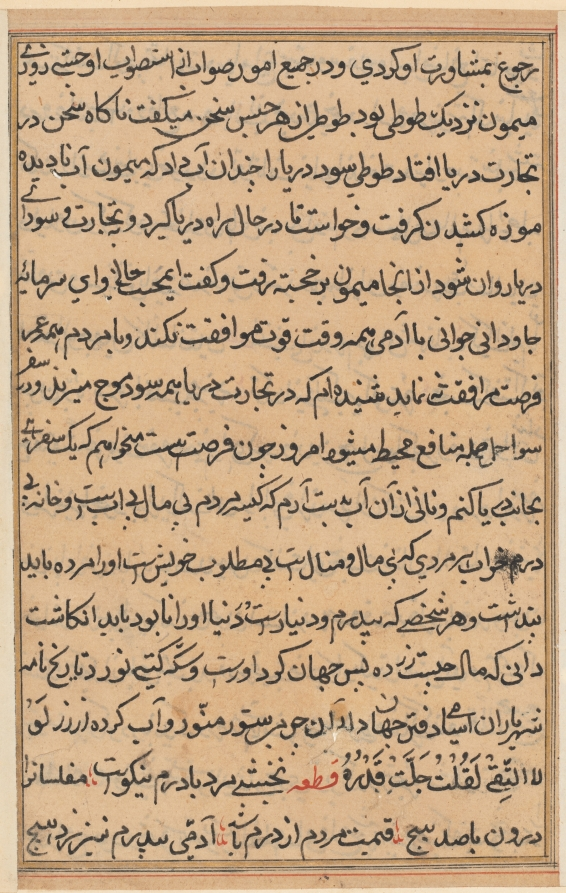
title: Page from Tales of a Parrot (Tuti-nama): text page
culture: Mughal India, court of Akbar (reigned 1556–1605)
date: c. 1560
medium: gum tempera, ink, and gold on paper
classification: Painting